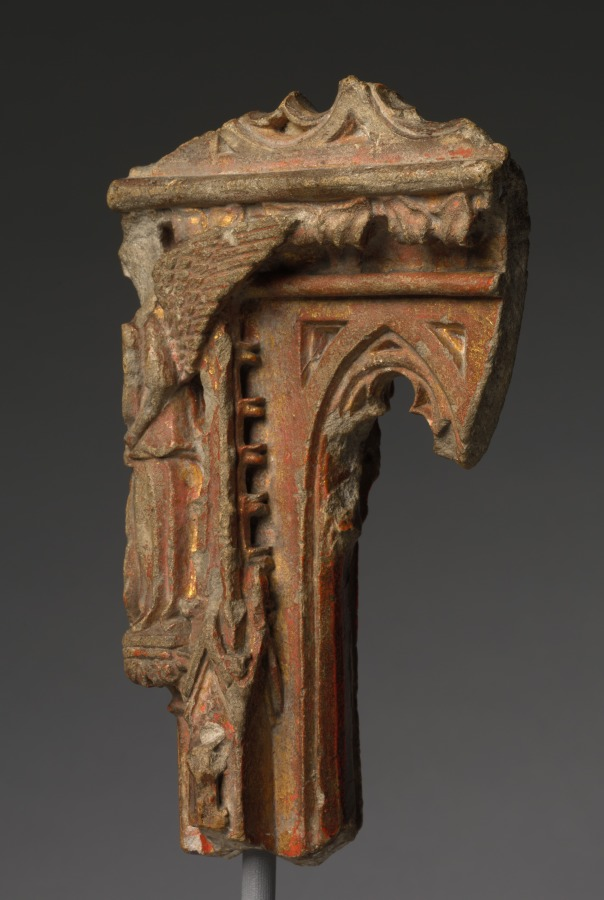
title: Fragment of an Architectural Canopy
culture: France, early 15th century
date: early 1400s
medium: limestone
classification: Sculpture